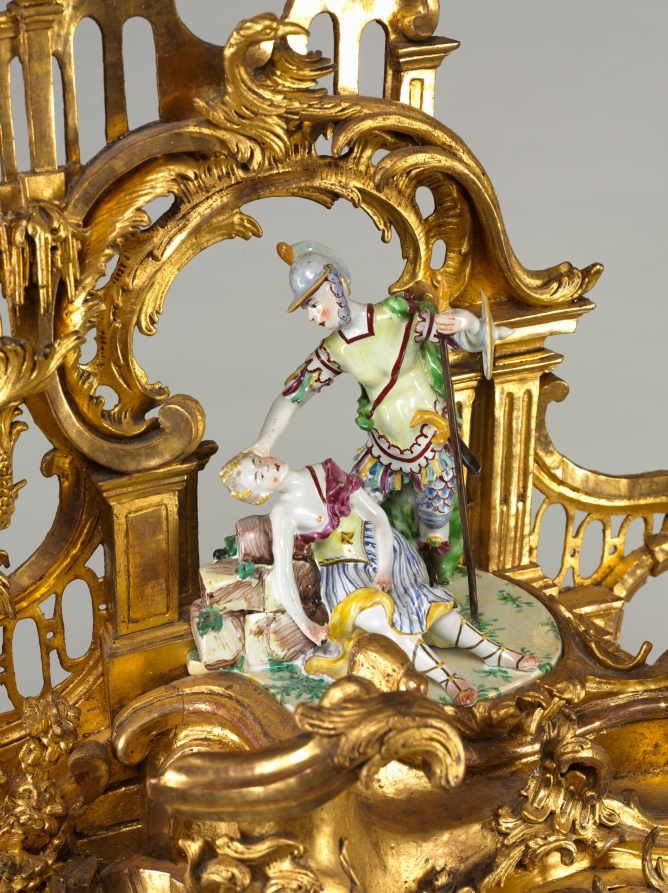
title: Clock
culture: Germany, 18th century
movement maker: Baumgartinger (German)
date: c. 1750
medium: carved and gilded wood, faience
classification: Furniture and woodwork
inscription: inscribed on face: Baumgartnger [sic] Mergentheim.